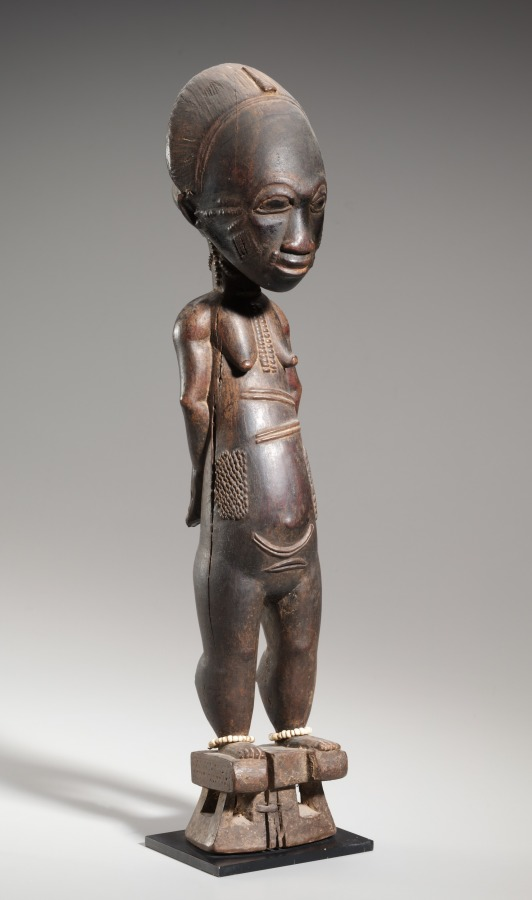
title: Female Figure from a Pair (asye usu)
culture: Africa, West Africa, Côte d’Ivoire, Baule-style carver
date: late 1800s–early 1900s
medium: Wood, resin, glass beads, plant fiber, and metal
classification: Sculpture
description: Baule figures carved as pairs usually represent untamed spirits of the wilderness called asye usu. These spirits may intervene in the lives of individuals by taking possession of them. If this possession does not result in madness, it can lead to the human host’s becoming a diviner who can enter into a trance to reveal the causes of ailments and other misfortunes. People who feel their lives are being interrupted by the asye usu commission carvings representing idealized male and female forms whose grace and beauty in both anatomy and adornment will seduce the spirits and compel them to use the sculptures as their temporary homes.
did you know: Baule artists looked to the world around them to capture contemporary ideas and ideals of beauty; this figure's hairstyle would have been worn when the sculpture was carved.